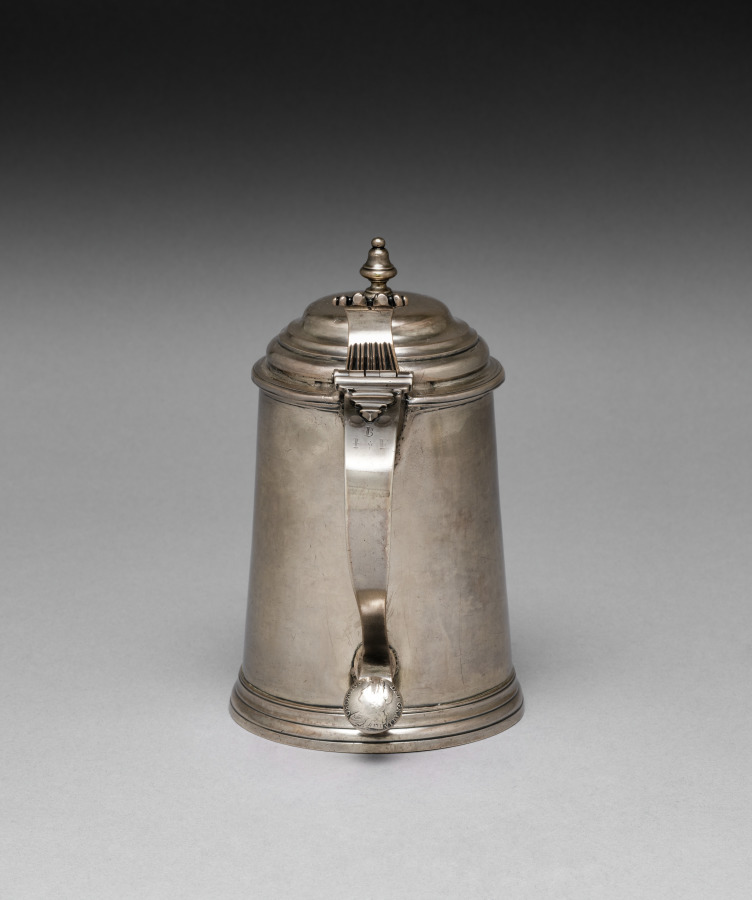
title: Tankard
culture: America, Massachusetts or Rhode Island, 18th century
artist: Jonathan Clarke (American, 1706–1766)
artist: or Joseph Clark (American)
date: c. 1750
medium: silver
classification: Silver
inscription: Engraved on handle: "B" over "I*E".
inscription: Stamped on handle: "Georgius II Deui Gratia".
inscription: Stamped underside: "I. Clark".